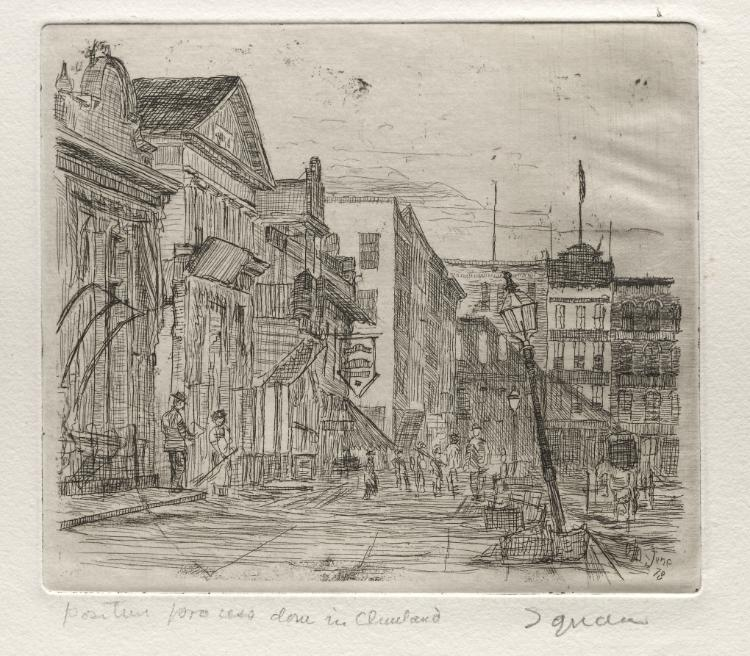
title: The Square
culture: America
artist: Otto H. Bacher (American, 1856–1909)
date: 1878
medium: etching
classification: Print